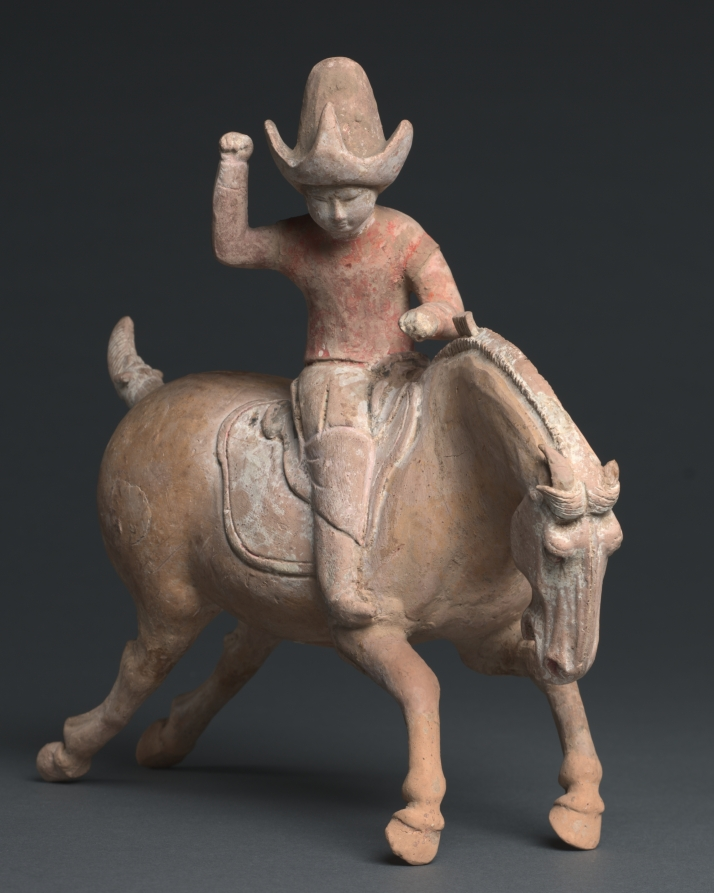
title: Polo Player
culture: China, Tang dynasty (618-907)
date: late 600s-early 700s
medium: painted earthenware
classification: Sculpture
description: An exercise for military troops, polo was also fashionable among men and women of Tang China, and this polo player is actually a woman dressed in a man's riding habit. It is in keeping with the exuberance of the Tang dynasty that such sporting figures of daily life should be among objects for the afterlife.